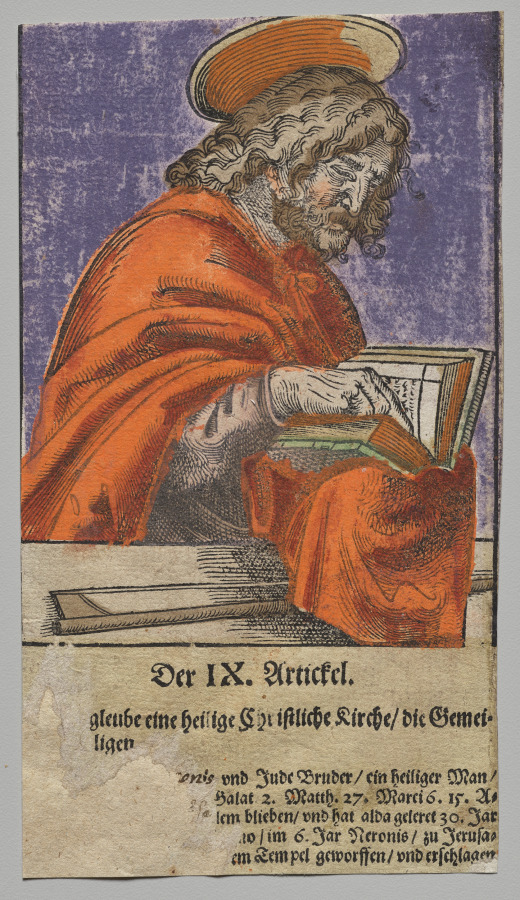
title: James the Less from Christ, the Apostles, and Saint Paul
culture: Germany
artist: Lucas Cranach the Elder, After (German, 1472–1553)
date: 1563/64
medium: Woodcut with letterpress text, hand colored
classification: Print